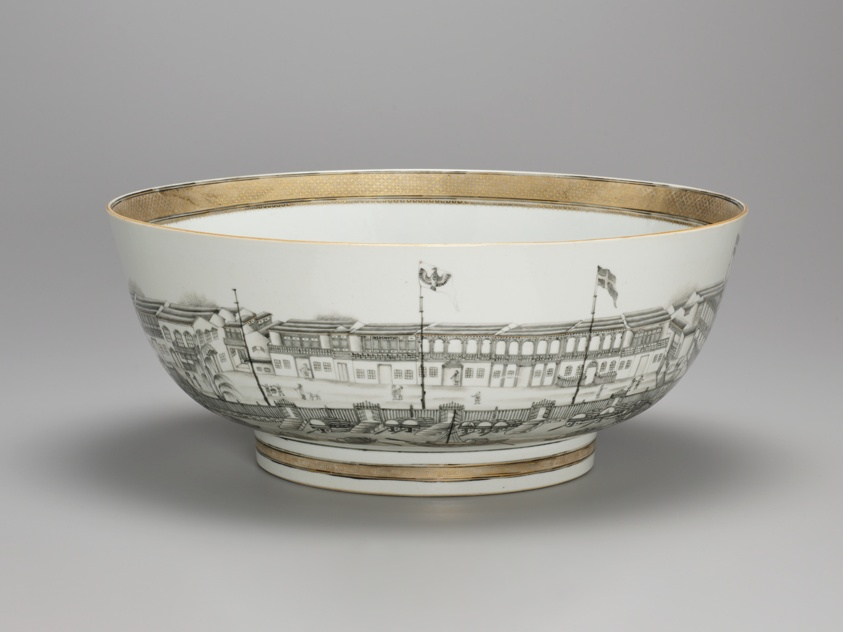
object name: Ceramics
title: Punch Bowl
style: chinese export, Export porcelain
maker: Artist unknown (Chinese, made for the American market); China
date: c. 1789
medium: Hard-paste porcelain, glaze, enamels in colors, gilding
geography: China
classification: punch bowl; chinese export porcelain; American market; art of the americas; ceramics; porcelain; decorative arts; pottery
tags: Canton, factory, port, cities, building, drinking